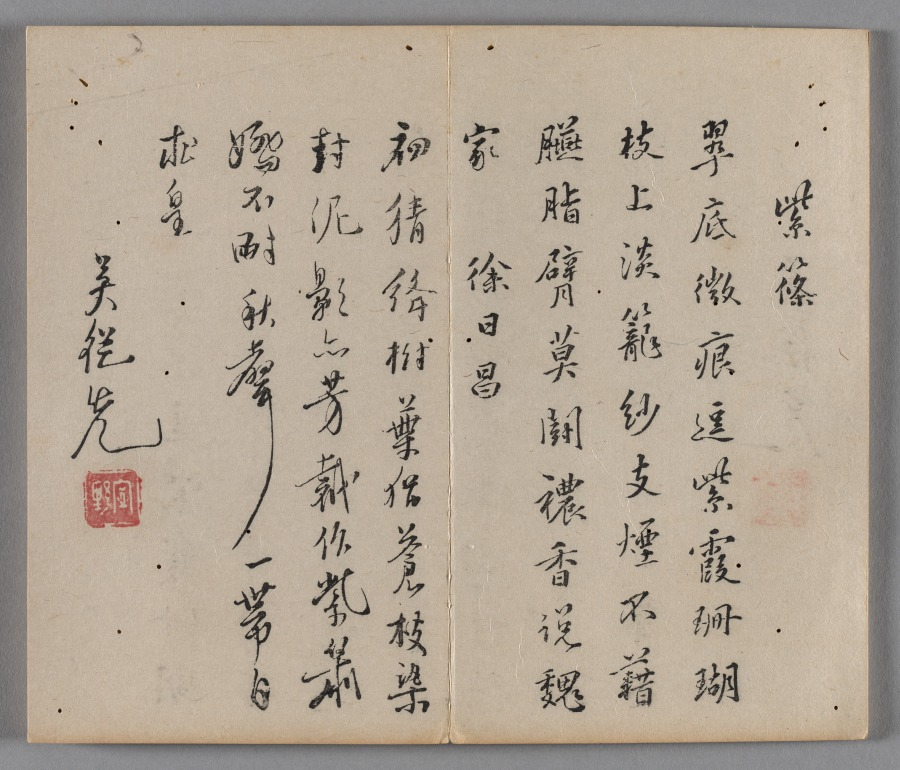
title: Ten Bamboo Studio Painting and Calligraphy Handbook (Shizhuzhai shuhua pu): Bamboo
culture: China, Qing dynasty (1644-1911)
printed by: Hu Zhengyan (Chinese, c. 1584–1674)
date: 1633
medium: Woodblock-printed book; ink and colors on paper; first edition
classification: Print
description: Color printing reached a level of perfection in the early 1600s, as seen in this Ten Bamboo Studio Collection of Calligraphy and Painting and the Mustard Seed Garden Manual of Painting (printed 1679 and 1701). The painterly quality, precision in registering (aligning) the woodblocks, and harmonious colors made them the most successful color print editions in Chinese history. Both editions were printed and compiled in Nanjing, spread nationwide, and had a great impact on the arts in Japan and Korea.